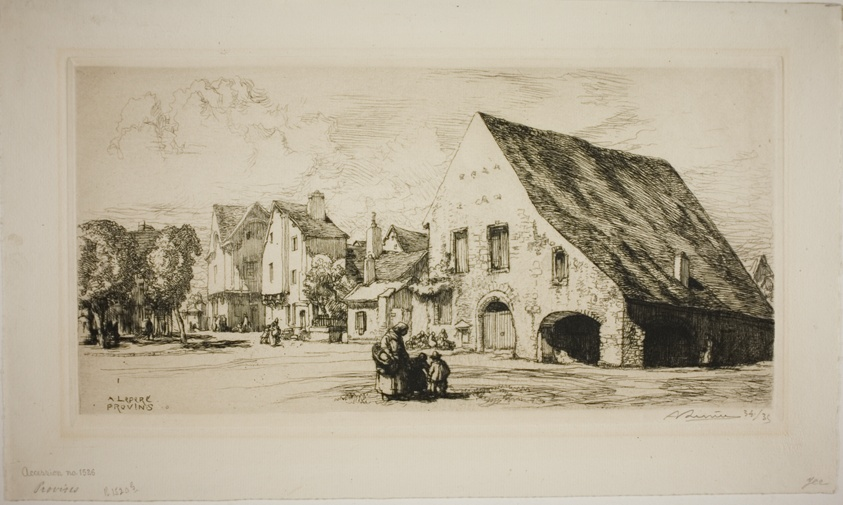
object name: Print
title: Provins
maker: Louis Auguste Lepère (French, 1849-1918)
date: 1910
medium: Etching on cream laid paper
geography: France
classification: etching; print; prints and drawing